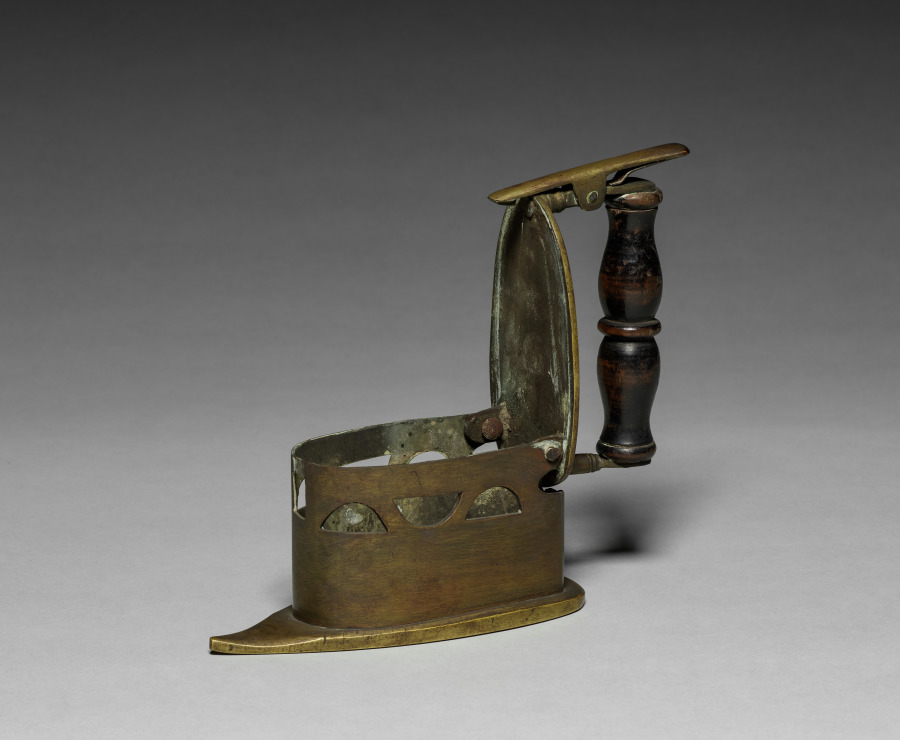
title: Pressing Iron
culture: Europe, 18th century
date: 1700s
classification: Tool